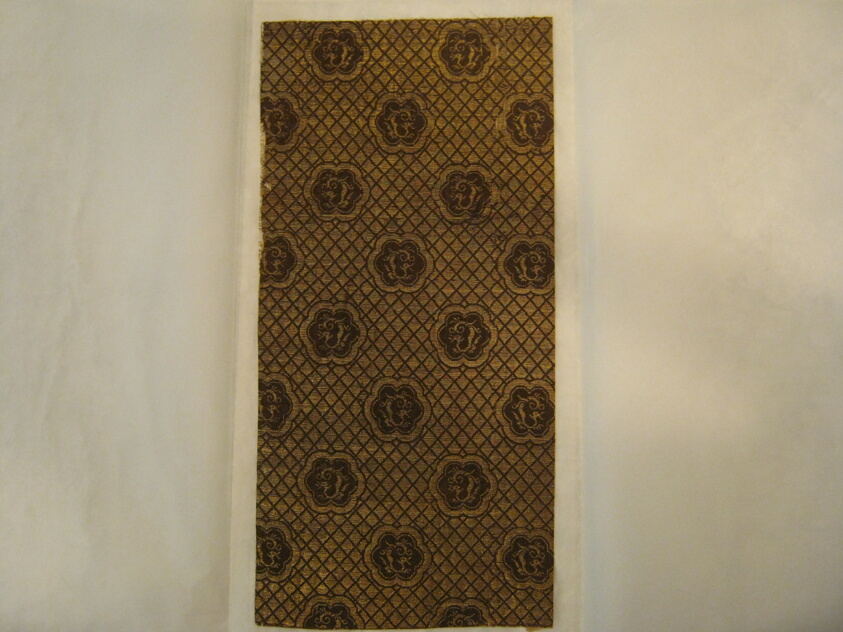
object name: Textile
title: Fragment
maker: Japan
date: Edo period (1615–1868), 1775/1825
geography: Japan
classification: textile; weaving